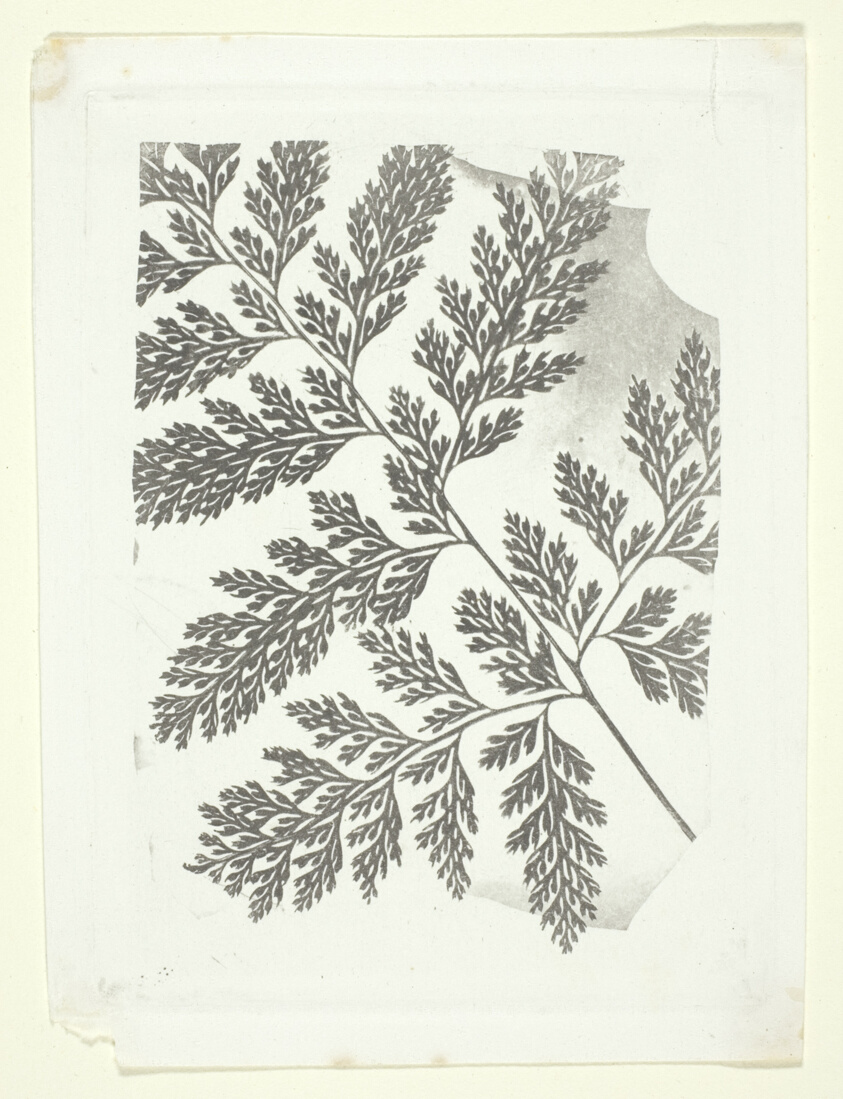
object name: Photograph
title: Branch of a Fern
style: 19th century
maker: William Henry Fox Talbot (English, 1800–1877)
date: c. 1853/58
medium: Photoglyphic engraving made without a gauze or resin ground screen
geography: England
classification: engraving; printing process; photography; photograph